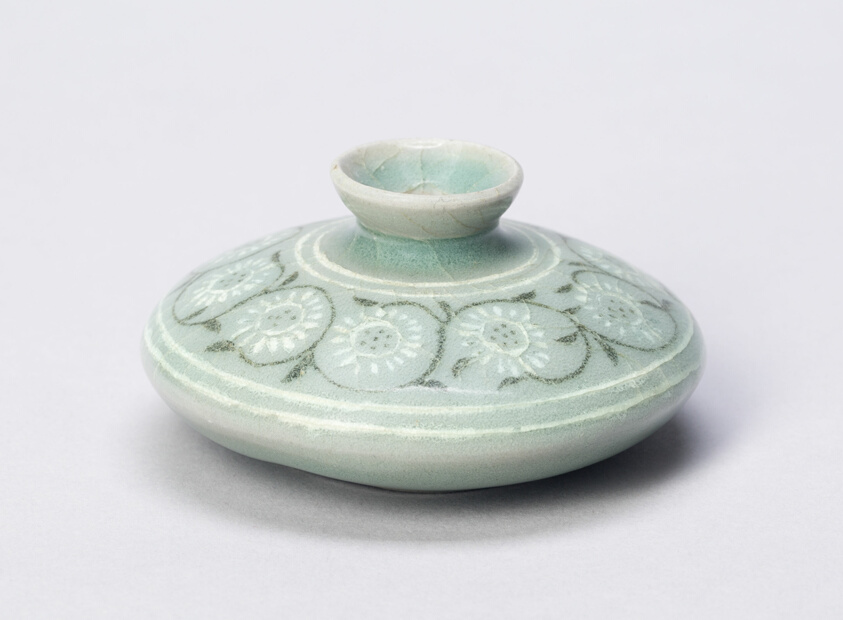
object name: Vessel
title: Covered Jar with Floral Motif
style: Korean (culture or style)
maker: Korea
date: Goryeo dynasty (918–1392), 12th century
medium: Stoneware with celadon glaze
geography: South Asia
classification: vessel